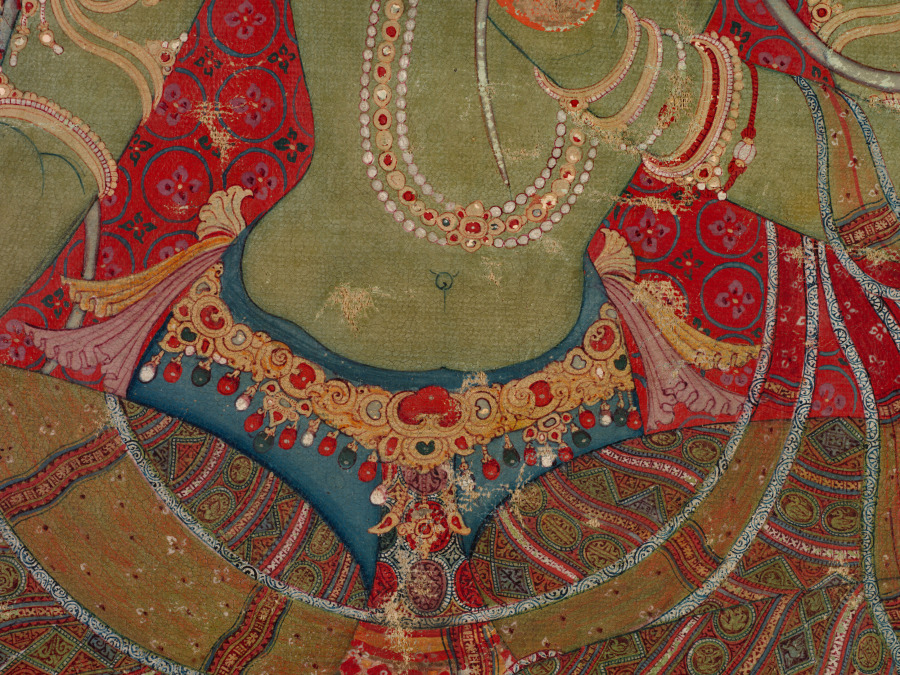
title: Green Tara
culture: Central Tibet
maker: attributed to Aniko (Nepalese, active in Tibet mid- to late 1200s)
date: c. 1260s; mounted, 2020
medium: thangka; gum tempera, ink, and gold on sized cotton; mount: silk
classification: Painting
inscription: Om Ah Hum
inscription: om tare tutare ture svaha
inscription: Om Ah Hum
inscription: Om Ah Hum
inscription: om ah sarva vyida svaha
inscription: ye dharmā hetuprabhavā he- tuṃ teṣāṃ tathāgato hy avadat teṣāṃ ca yo nirodha evaṃvādī mahāśramaṇaḥ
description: For Tibetans, Green Tara is one of the preeminent figures of their Buddhist faith, a radiant savioress who embodies the female form of the perfect, enlightened mind. The Green Tara in the Cleveland thangka—a Tibetan devotional painting on cloth—specifically dispels fear and provides protection, just like her mantra inscribed on the back side of the painting. Her green color and fear-not gesture link her to the cosmic Buddha of the North, enshrined above her head. Most scholars agree that this work was painted by the celebrated Nepalese artist known as Aniko.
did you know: The tiny monastic figure under Green Tara's right hand commissioned the painting.